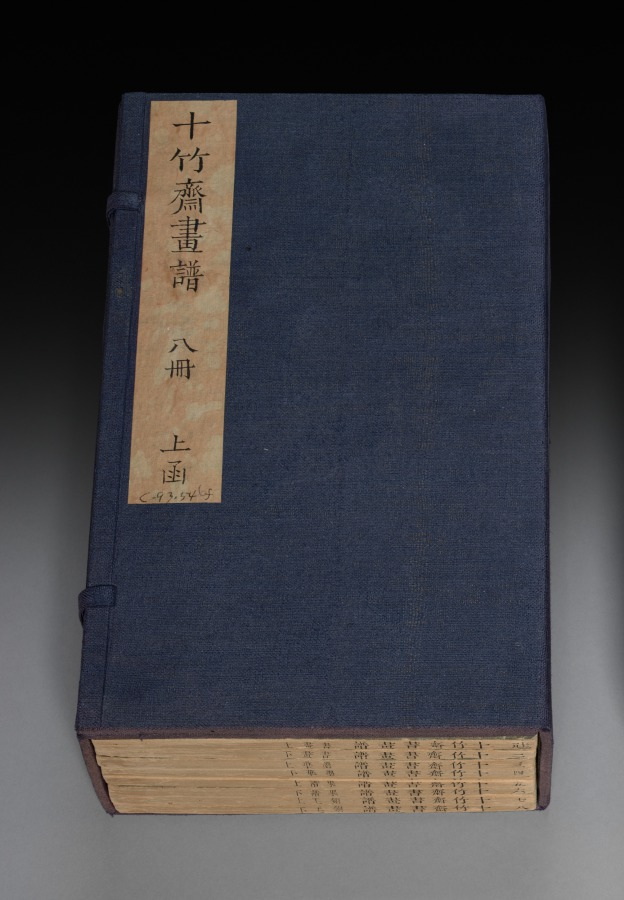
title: Ten Bamboo Studio Painting and Calligraphy Handbook (Shizhuzhai shuhua pu): Volume One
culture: China, Qing dynasty (1644-1911)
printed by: Hu Zhengyan (Chinese, c. 1584–1674)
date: 1633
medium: Woodblock-printed book; ink and colors on paper; first edition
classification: Print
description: Color printing reached a level of perfection in the early 1600s, as seen in this Ten Bamboo Studio Collection of Calligraphy and Painting and the Mustard Seed Garden Manual of Painting (printed 1679 and 1701). The painterly quality, precision in registering (aligning) the woodblocks, and harmonious colors made them the most successful color print editions in Chinese history. Both editions were printed and compiled in Nanjing, spread nationwide, and had a great impact on the arts in Japan and Korea.